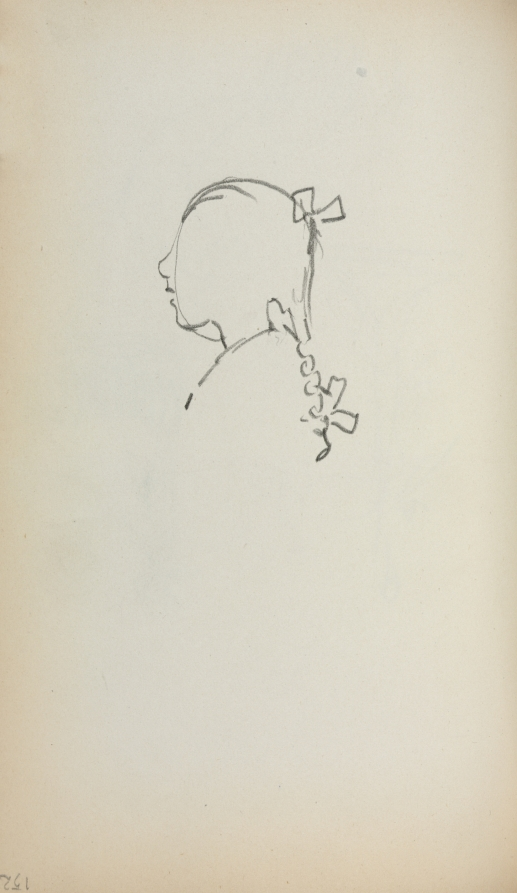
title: Italian Sketchbook: Head of a Girl in profile (page 152)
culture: America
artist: Maurice Prendergast (American, born Newfoundland [now Canada], 1858–1924)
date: 1898–1899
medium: pencil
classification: Bound Volume